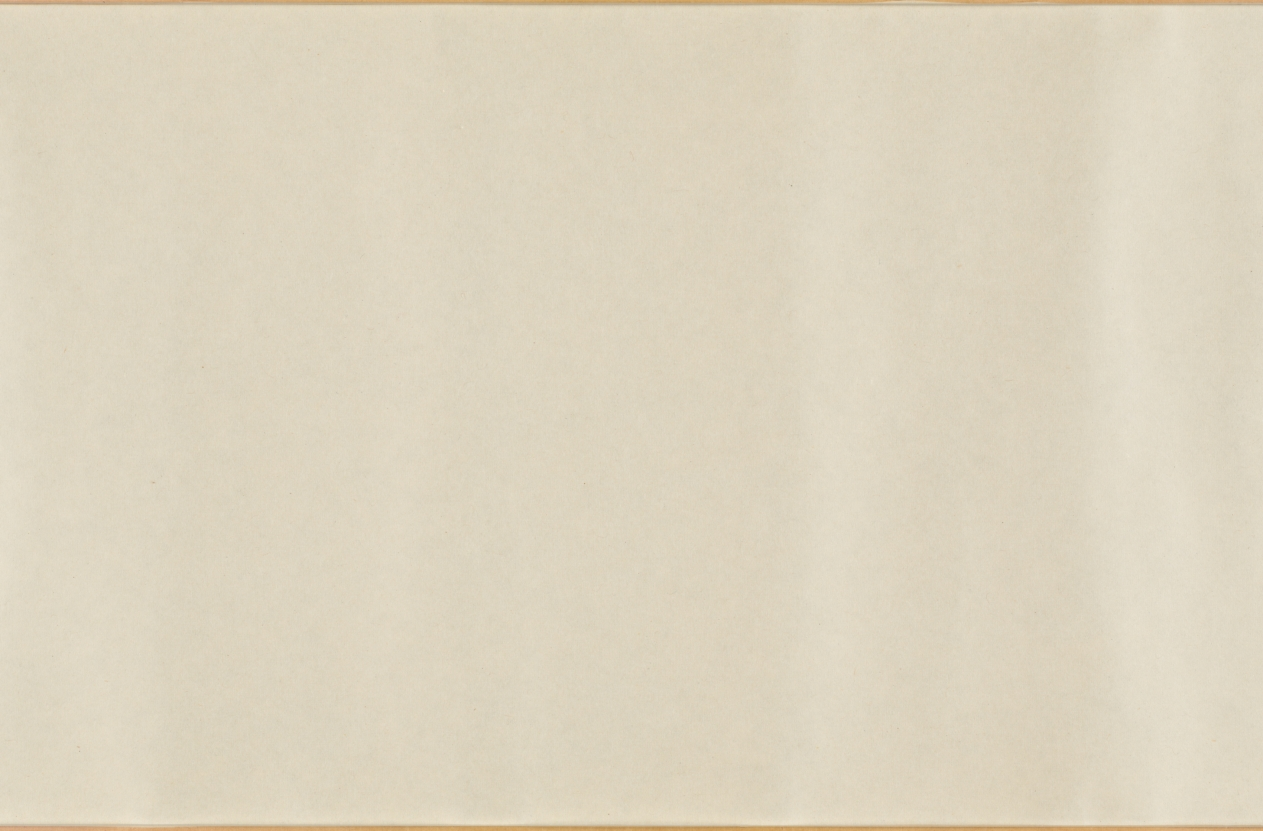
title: Selections from the New Collection of Japanese Poems from Ancient and Modern Times (Shinkokin wakashū) with Printed Designs of Chinese Lions and Crab Finger Grass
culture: Japan, Edo period (1615–1868)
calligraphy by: Hon'ami Kōetsu (Japanese, 1558–1637)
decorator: Tawaraya Sōtatsu (Japanese, c. 1570–c. 1640)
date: early 1600s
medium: handscroll; ink, gold, and silver on paper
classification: Calligraphy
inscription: Seal: 光悦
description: Hon’ami Kōetsu was a calligrapher and craftsman who frequently collaborated with the painter Tawaraya Sōtatsu, considered the first master of the Rinpa school. Kōetsu brushed seven poems from the autumn section of a poetry anthology onto dyed paper with motifs designed and printed in gold and silver by Sōtatsu.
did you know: Before becoming a master painter of screens, Tawaraya Sōtatsu painted fans.